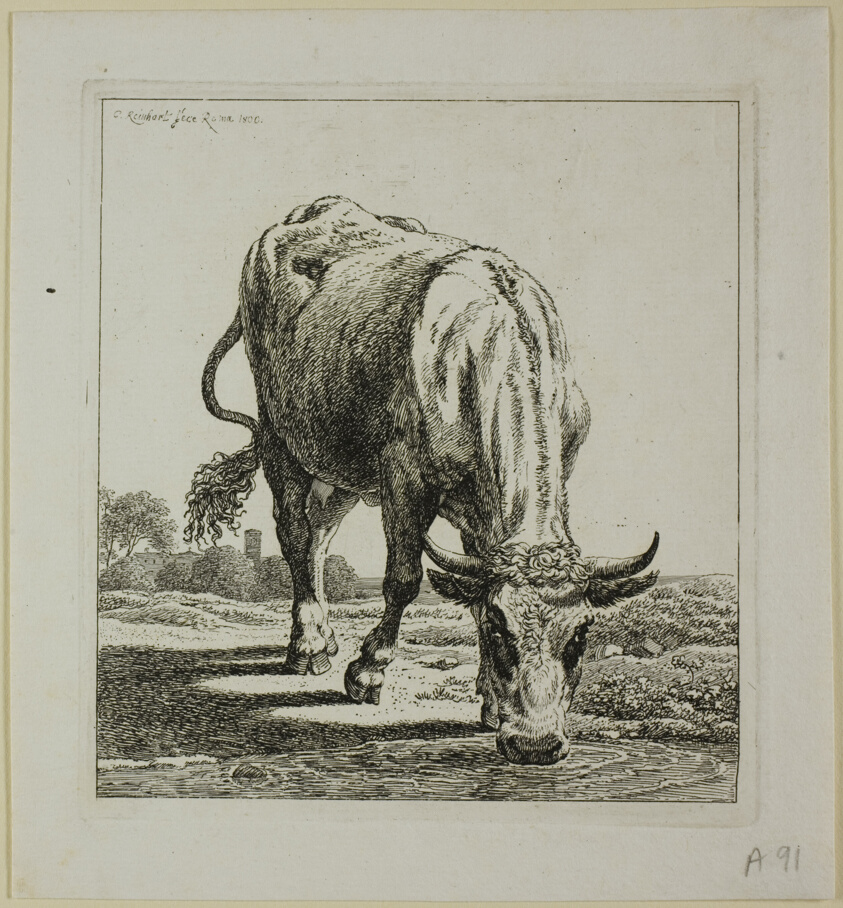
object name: Print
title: Cow Drinking, from Die Zweite Thierfolge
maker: Johann Christian Reinhart (German, 1761-1847)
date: 1800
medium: Etching on ivory laid paper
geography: Germany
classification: etching; print; prints and drawing